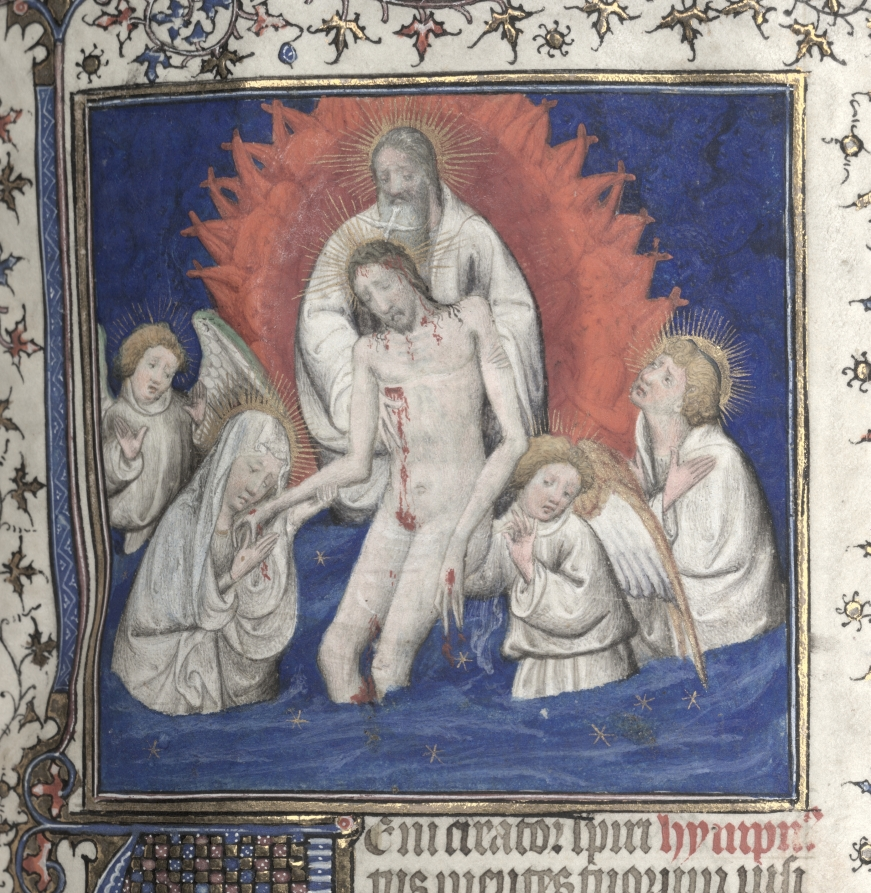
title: The Gotha Missal: Fol. 1r, Trinity and Resurrection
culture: France, Paris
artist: Master of the Boqueteaux (French)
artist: and Workshop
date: c. 1375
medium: ink, tempera, and gold on vellum; blind-tooled leather binding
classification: Bound Volume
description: The style and quality of this manuscript's decoration is typical of deluxe Parisian books made for aristocratic or royal patrons. Most of the book's decoration appears to be the work of the Master of the Boqueteaux, an artist active at the court of King Charles V (died 1380). His style was apparently shared by a number of book illuminators working in and around Paris. It is very possible that the Gotha Missal belonged to Charles V, but is not provable because the manuscript has no royal portraits and lacks a colophon. Given the book's magnificent decoration, however, it would seem that it was produced for a Valois prince, if not for the king himself. The manuscript receives its name from the German dukes of Gotha, its later owners.